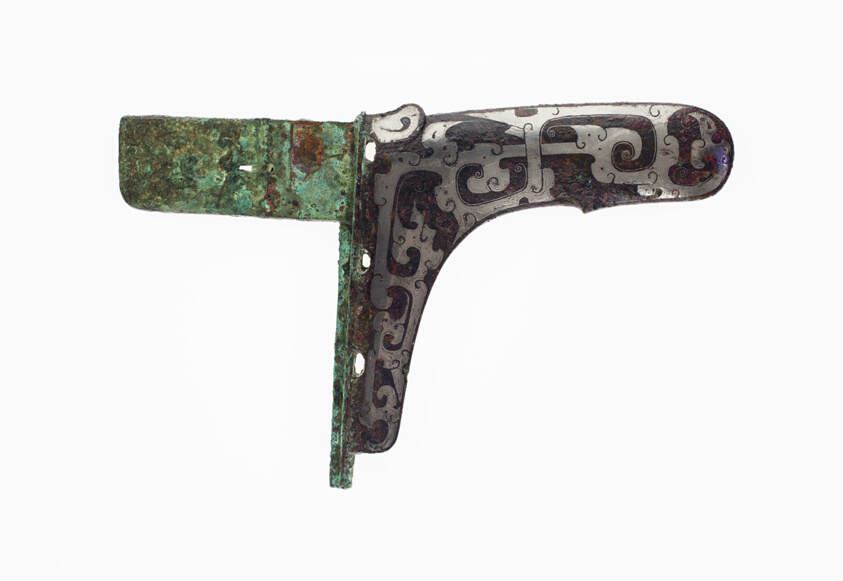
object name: Decorative Arts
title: Dagger-Axe (Ge)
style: Chinese (culture or style)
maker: China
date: Eastern Zhou dynasty, Warring States period (480–221 B.C.)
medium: Bronze inlaid with silver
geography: China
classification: bronze; metal; weapon; asian art; decorative arts